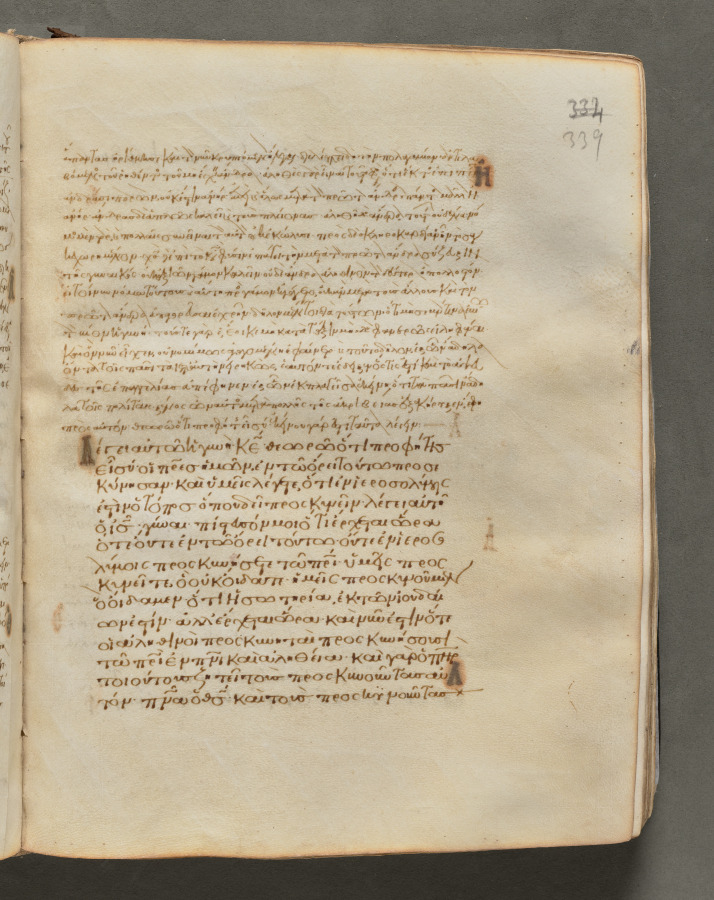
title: Text, folio 339 (recto), from a Gospel Book with Commentaries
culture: Byzantium, Constantinople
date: c. 1000–1100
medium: ink, tempera, and gold on vellum; leather binding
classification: Bound Volume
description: Each of the four gospels in this book opens on a page with brilliantly illuminated borders depicting the author of the text as well as birds—principally peacocks, symbols of the immortality of the soul—and fountains, representing the fountain of life and the salvation of the soul. This volume consists of 428 leaves with texts in Greek. Its level of sophistication suggests that it was probably written and decorated in a monastery in Constantinople.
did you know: Gospel books were carried in procession through Byzantine churches.